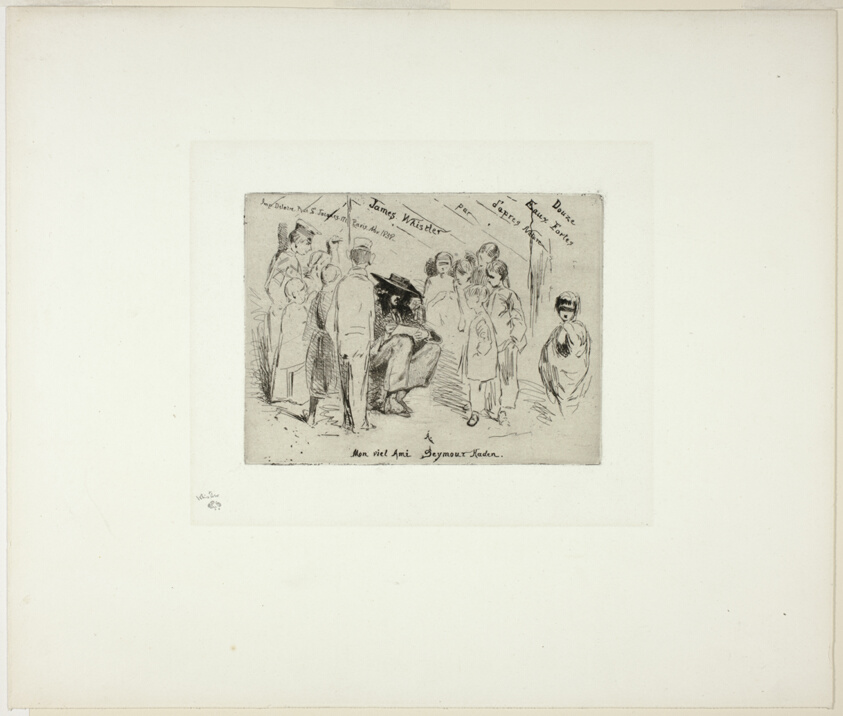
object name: Print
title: The Title Page for 'Douze Eaux Fortes d'après Nature'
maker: James McNeill Whistler (American, 1834-1903)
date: 1858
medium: Etching with foul biting in black ink on off-white China paper laid down on off-white wove paper (chine collé)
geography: United States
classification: etching; foul biting; print; prints and drawing; paper